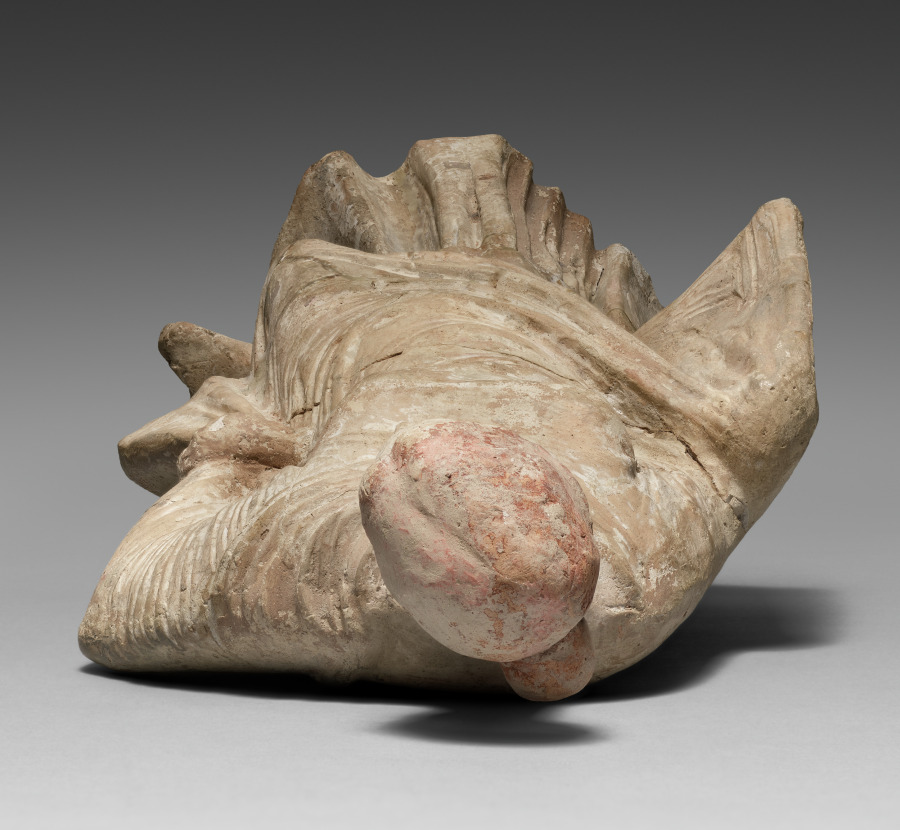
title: Figurine of Standing Woman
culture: Greece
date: 200s BCE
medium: terracotta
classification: Sculpture